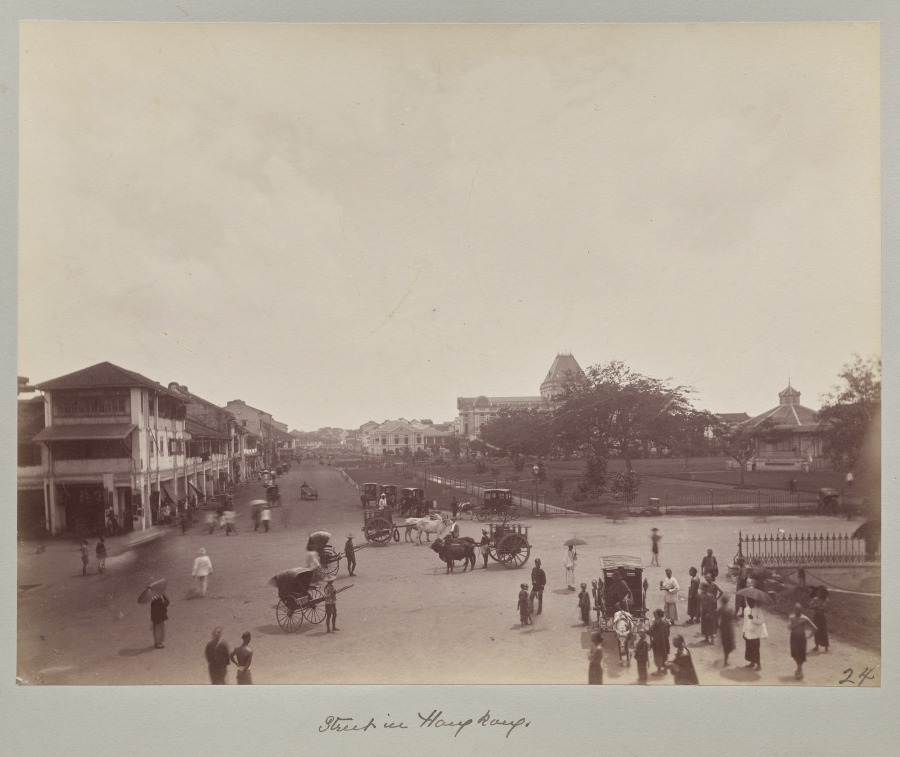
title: Hong Lim Green, Singapore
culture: England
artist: London Stereoscopic and Photographic Company (active, 1854–1922)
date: c. 1887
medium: albumen print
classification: Photograph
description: The Chinese were the largest ethnic group in Singapore, which became a British crown colony in 1867. The land for the public park seen here was donated by the eminent Chinese businessman Cheang Hong Lim in 1876. In 1887 the Straits Chinese Recreation Club built the octagonal building in the center of the park to serve as its clubhouse. Over 100 Chinese and European gentlemen were invited to its opening. The club used the green for English outdoor sports such as lawn tennis and cricket.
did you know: In 1858, the London Stereoscopic and Photographic Company offered over 100,000 topographical images for sale.